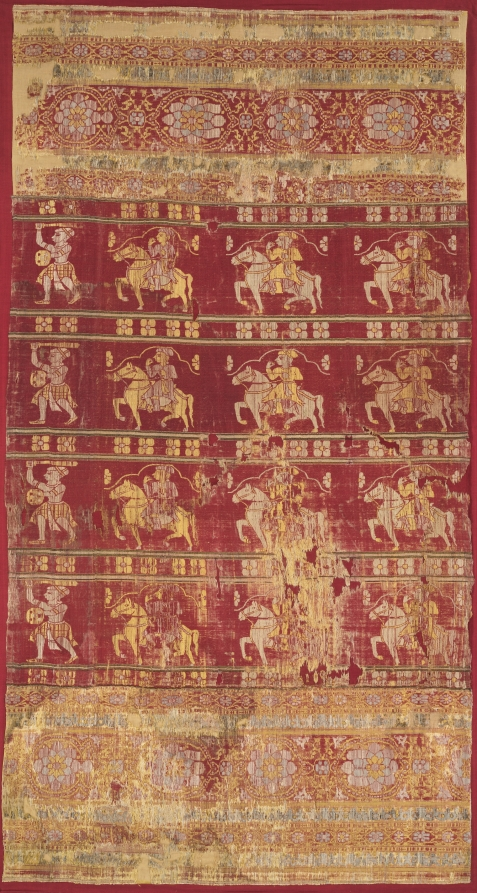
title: Tent Hanging (Part of a Larger Piece)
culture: India, Gujarat, Ahmadabad, 16th-early 17th century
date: 1560–1610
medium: Silk; lampas weave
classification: Textile